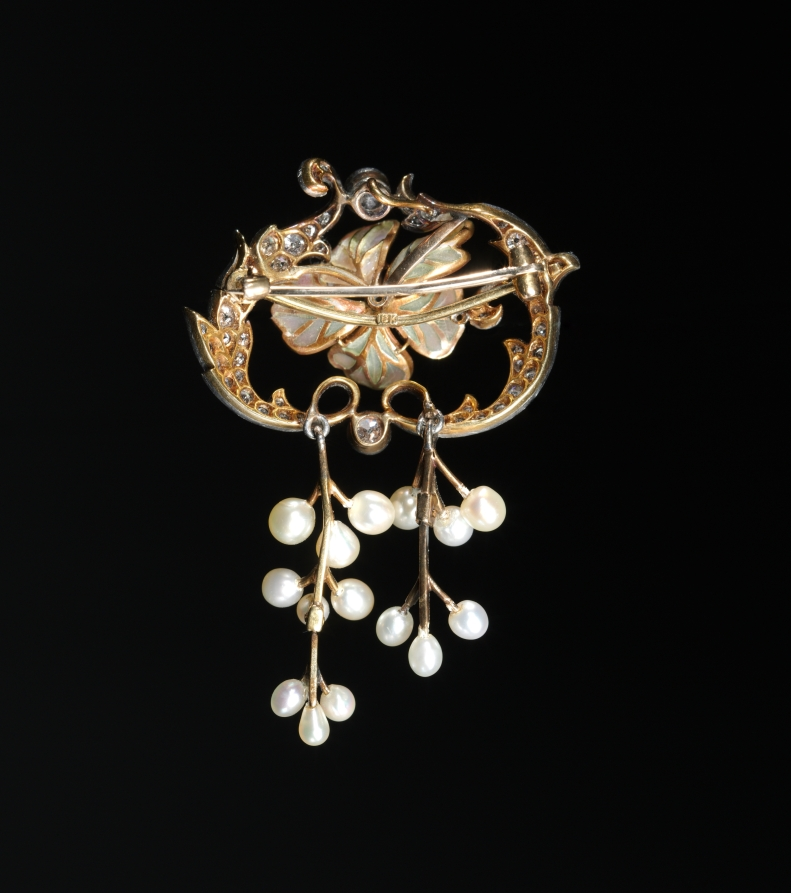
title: Brooch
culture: America, New Jersey, Newark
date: c. 1890–1910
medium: pearls, diamonds, enamel, gold, platinum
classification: Jewelry